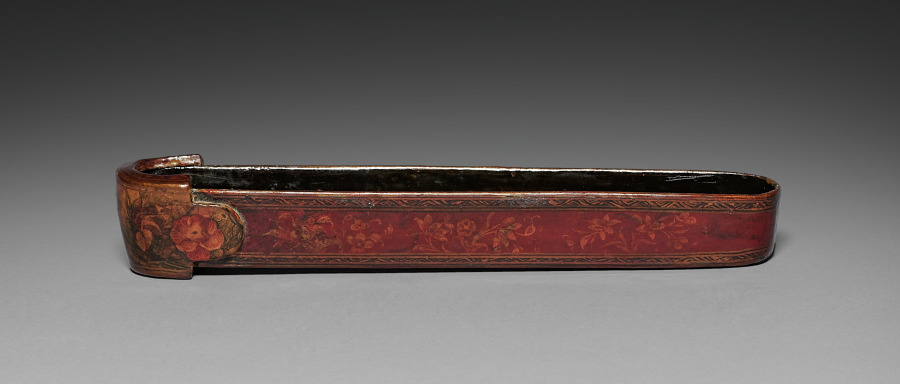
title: Pen and Ink Box (base)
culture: Iran, probably Isfahan, Safavid period (1501–1722)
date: 1667–98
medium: Varnished lacquer and opaque watercolor over papier-mâché, ink, and copper alloy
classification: Lacquer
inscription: 1109